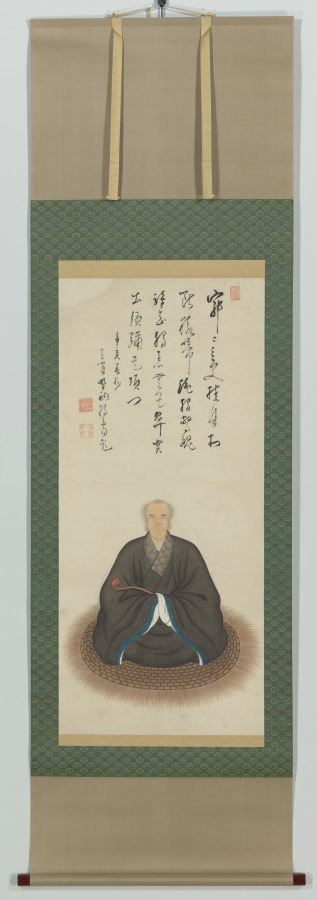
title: Portrait of Duli Xingyi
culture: Japan, Edo period (1615–1868)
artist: Kita Genki (Japanese, active c. 1664–98)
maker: Duli Xingyi (Chinese, 1596–1672)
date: 1671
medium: hanging scroll; ink and color on paper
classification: Painting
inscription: 1671 inscription at top of scroll by Duli Xingyi with three seals, 東矣䪩 (prefatory), 遺世獨立 (top) , 天外一閒人 (bottom); seal of Genki at lower left of painting 元規 .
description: In this portrait, the Ōbaku school Buddhist monk Duli Xingyi (born Tai Li, 1596–1672), whose name is pronounced Dokuryū Shōeki in Japanese, sits upon a woven mat holding a ceremonial scepter known as a ruyi, or nyoi in Japanese. Above his head is an insciption he added to the painting in 1671, the year before his death. It may be translated to read: Contemplative emptiness: the moon suspended over the village at midnight. Suddenly my soul is startled by the howl of an ape. Who could know that it would arouse me beyond my senses, and bring me an inner vision from Mt. Sumeru. (translated by Stephen Addiss and Kwan S. Wong) Originally from what is now the city of Hangzhou in China, Duli emigrated to Japan in 1653, where he took monastic vows. His skills in calligraphy and seal carving were formidable. Painter Kita Genki combined Chinese brush styles he learned in Nagasaki with Western painting techniques to capture Duli's likeness.